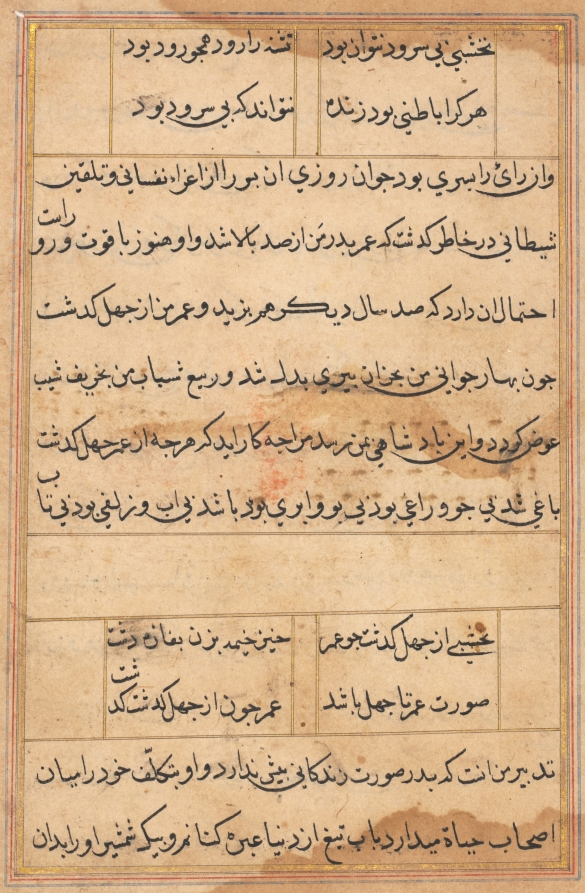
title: Page from Tales of a Parrot (Tuti-nama): text page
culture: Mughal India, court of Akbar (reigned 1556–1605)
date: c. 1560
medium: gum tempera, ink, and gold on paper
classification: Painting